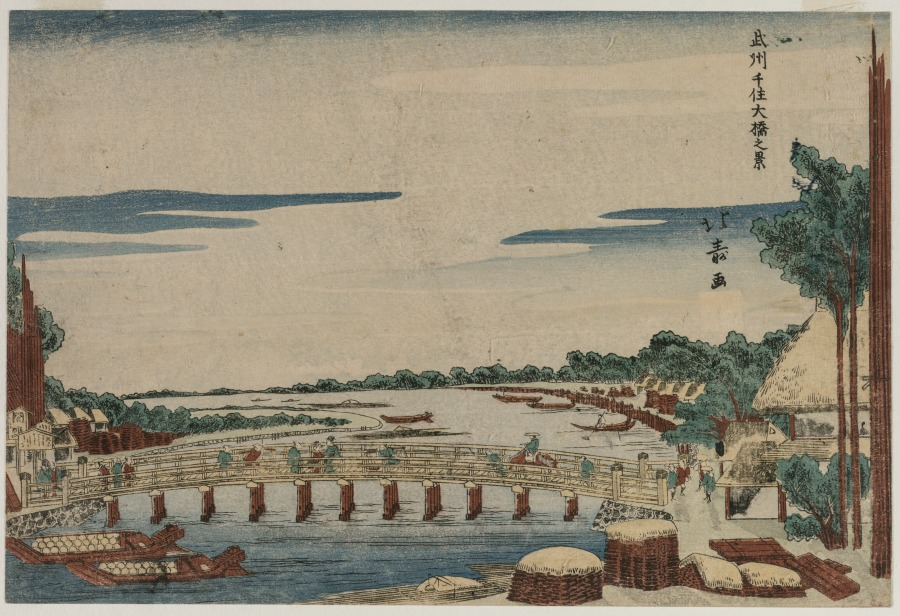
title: A View of the Great Bridge at Senju in Musashi Province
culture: Japan, Edo period (1615–1868)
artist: Shōtei Hokuju (Japanese, 1763-?)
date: c. 1820s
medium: color woodblock print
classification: Print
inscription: Hokuju ga